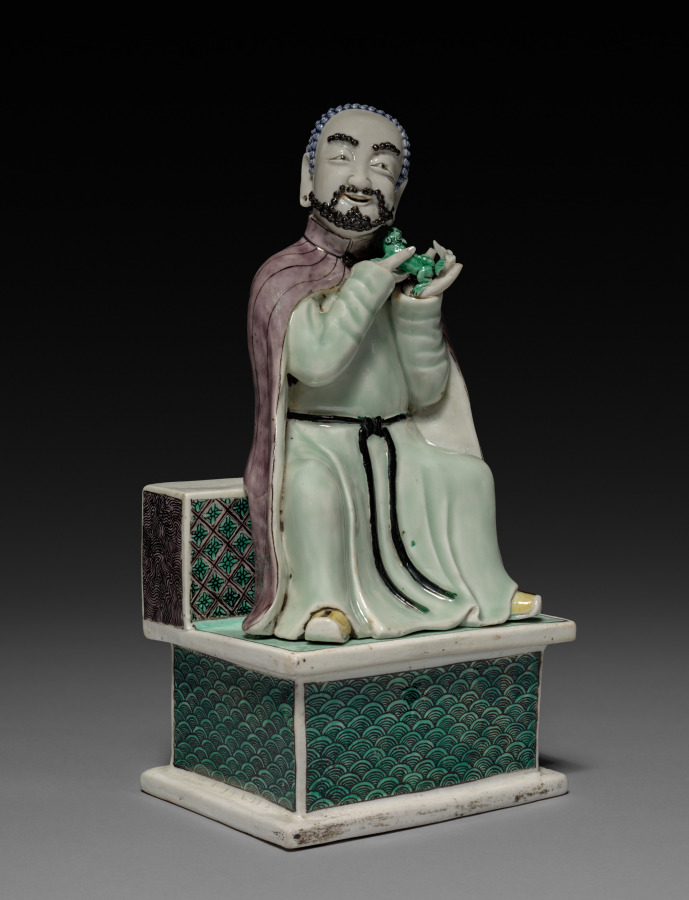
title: Lohan (Arhat) Holding a Fu Dog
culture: China, Jiangxi province, Jingdezhen kilns, Qing dynasty (1644-1911), Kangxi reign (1662-1722)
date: 1662–1722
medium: porcelain with famille verte overglaze enamel decoration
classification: Ceramic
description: Lohan are disciples of Buddha with supernatural powers and eccentric behaviors. This lohan is holding the fu-dog, symbolizing good luck, while its mate is holding the peach of longevity (shoutao). With carefree smiles and playful gestures, these two figures embody a humorous attitude and a detachment from worldly affairs. This pair of porcelain figures was perhaps part of a house altar set or a decorative item in a household.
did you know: This lohan and its pair embody a humorous attitude and playful behavior, indifference to danger and miracles, and hence a detachment from worldly affairs.